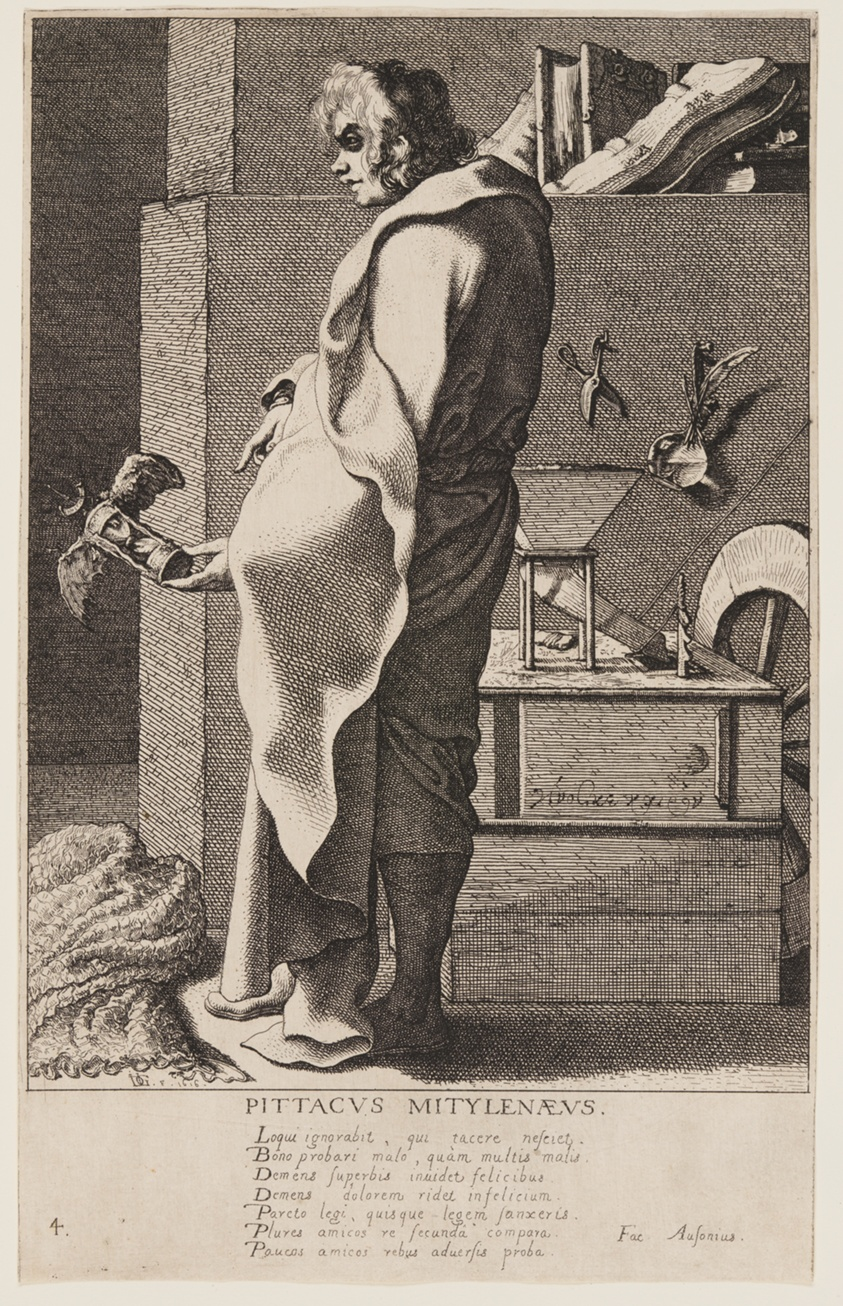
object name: Print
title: Pittacus Mitylenaeus, from Seven Wise Men of Greece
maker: Jacques de Gheyn III; Dutch, c. 1596-1641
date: 1616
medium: Etching on ivory laid paper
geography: Netherlands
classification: etching; paper; print; prints and drawing